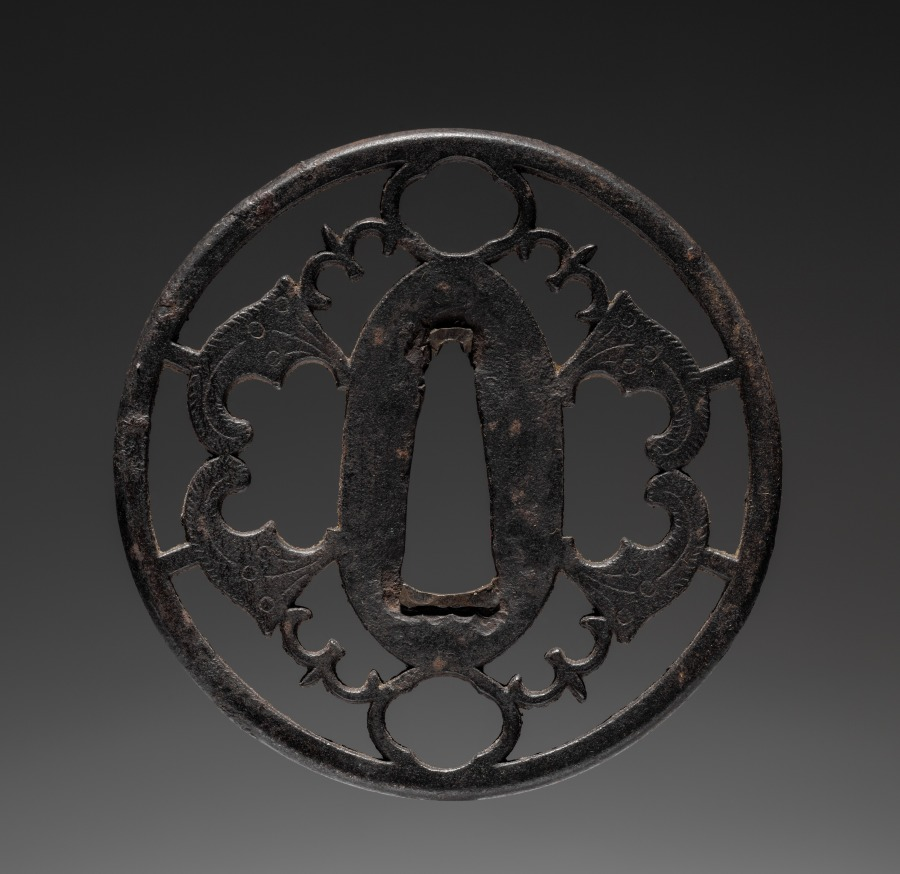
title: Sword Guard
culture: Japan, Edo period (1615–1868)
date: 1615–1868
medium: iron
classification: Arms and Armor